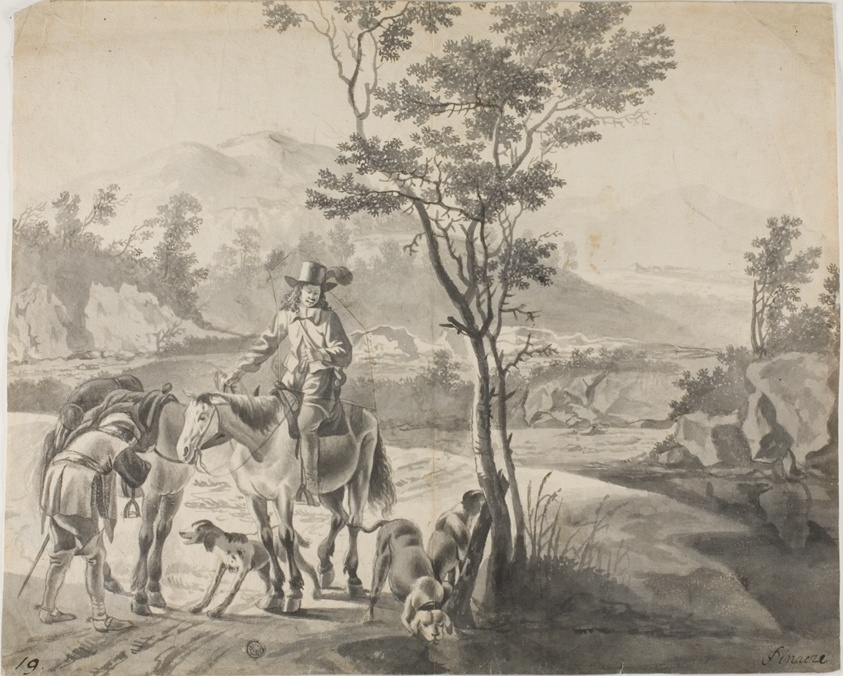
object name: Drawing and Watercolor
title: Riders and Dogs in Rocky Landscape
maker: Possibly after Adam Pynacker; Dutch, 1622-1673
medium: Brush with black and gray wash, with touches of graphite, on ivory laid paper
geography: Holland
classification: ink or chalk wash; drawings (visual works); prints and drawing